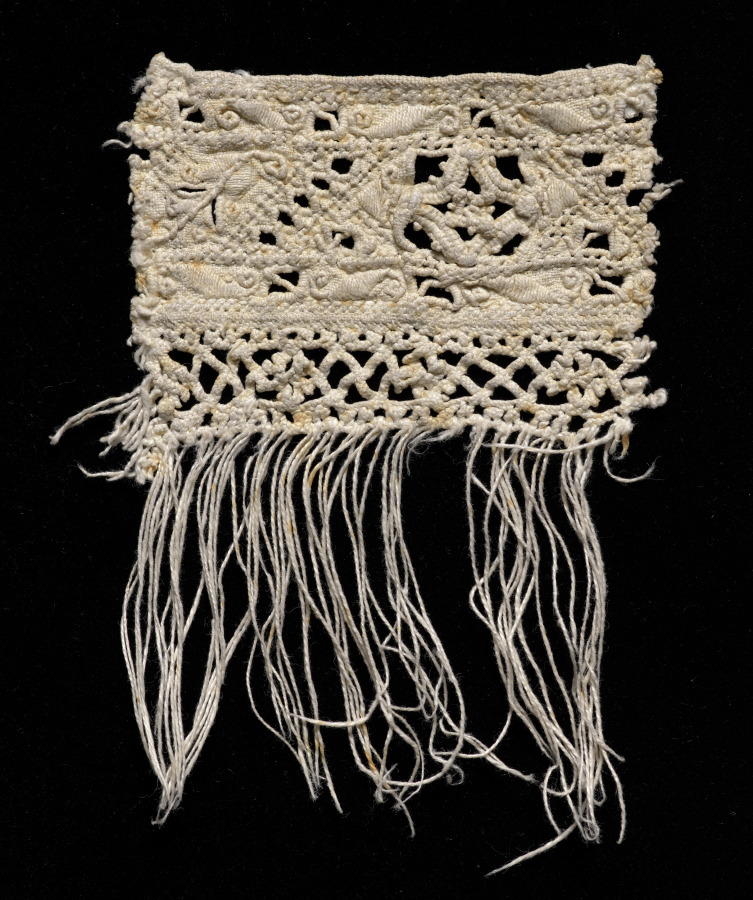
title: Lace Edging with Fringe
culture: Italy, Venice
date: 1500s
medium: Linen: needle lace (cutwork) insertion and bobbin lace edging and fringe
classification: Lace